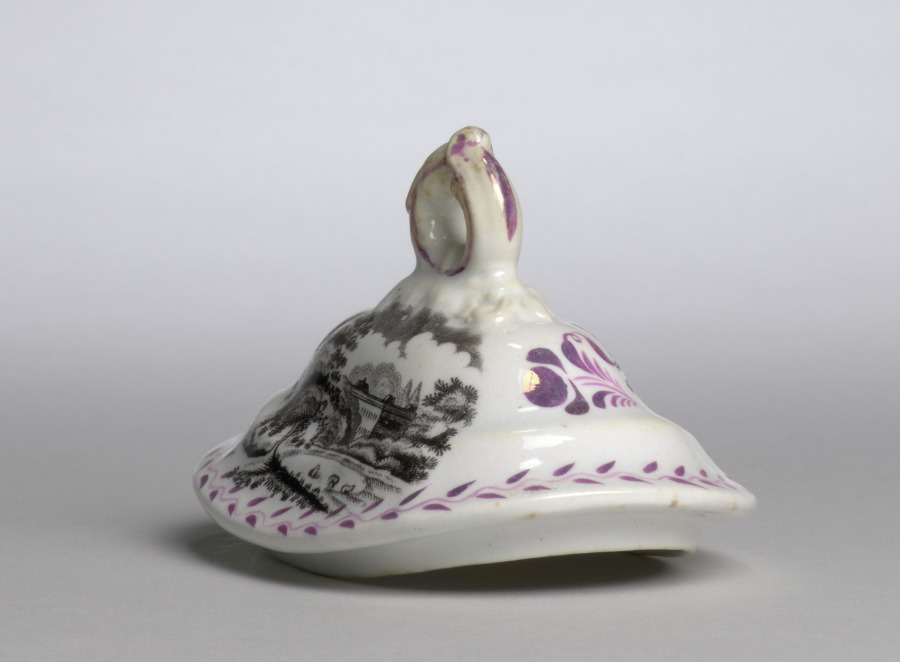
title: Sugar Bowl and Lid (lid)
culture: England, 19th century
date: c. 1800–1825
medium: earthenware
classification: Ceramic